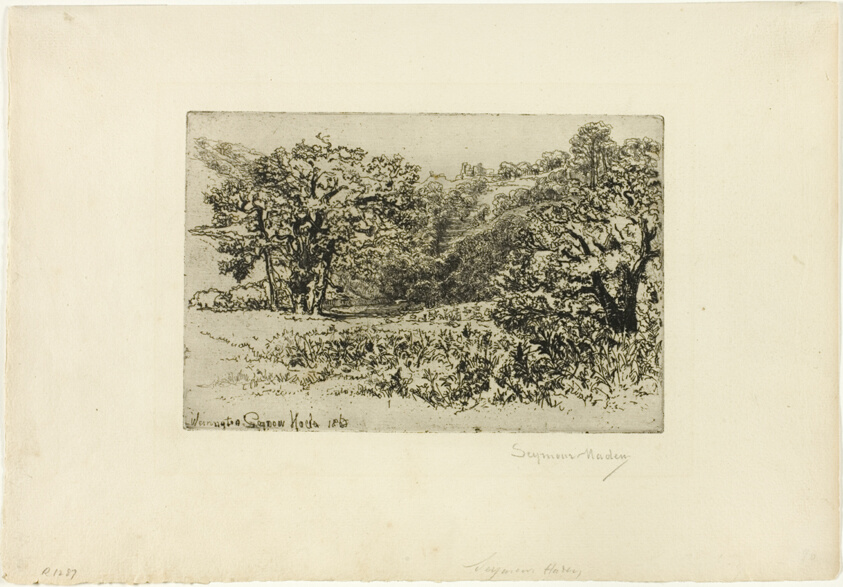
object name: Print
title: The Herd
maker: Francis Seymour Haden (English, 1818-1910)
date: 1868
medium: Etching on cream laid paper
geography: England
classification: etching; print; prints and drawing